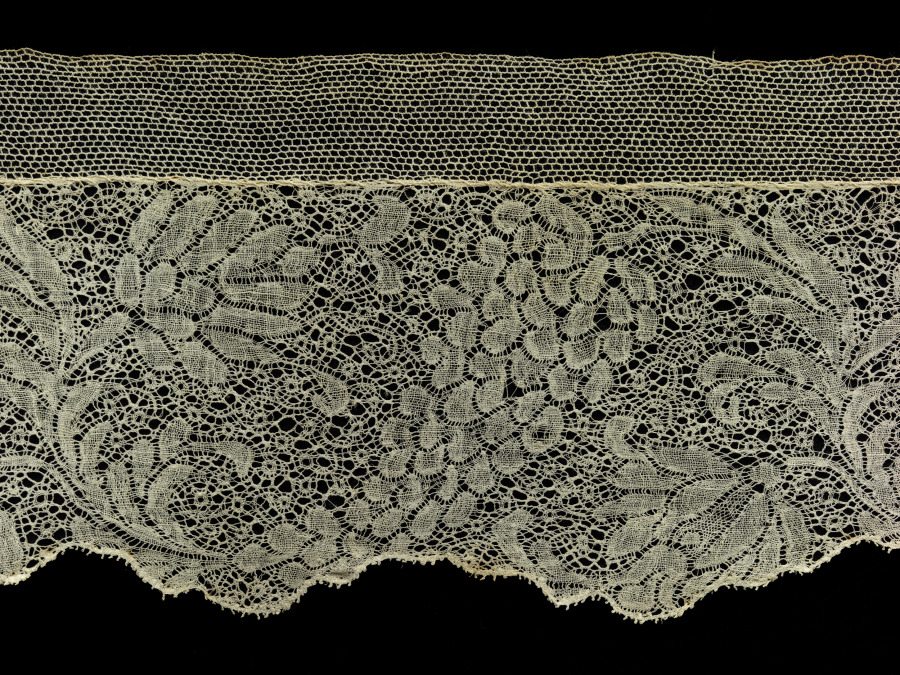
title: Lace Edging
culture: Belgium, Binche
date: 1700s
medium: Linen: bobbin lace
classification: Lace